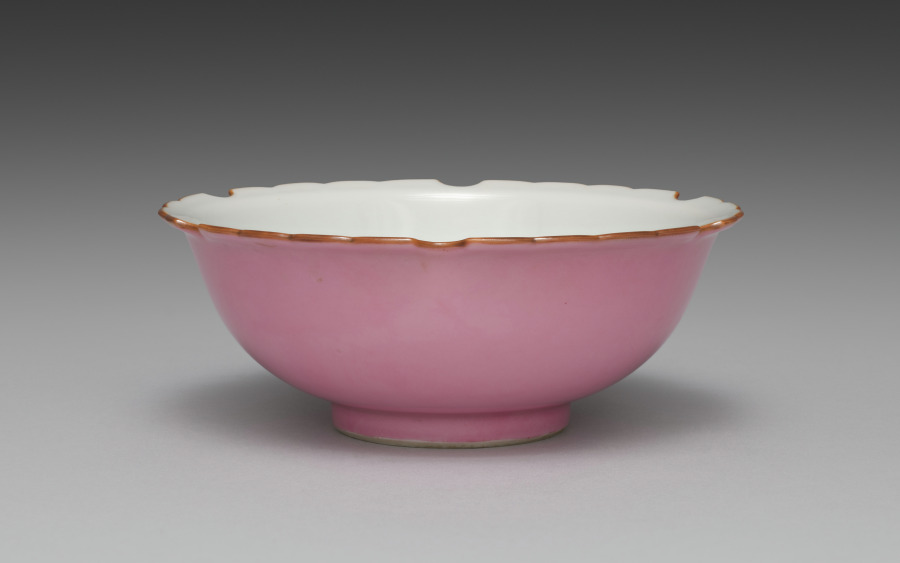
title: Dish from Snow-Flake Side Dishes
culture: Japan, Meiji period (1868–1912)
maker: Seifū Yohei III (Japanese, 1851–1914)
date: 1893–1914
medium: One from a set of six porcelain dishes; porcelain with lobed rims and pink glaze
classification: Ceramic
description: According to the box lid, this set of six side dishes, or mukōzuke, are “snow-flower style” (sekkashiki), having mouths shaped like snowflakes. Their mouths, which have six lobes and scalloped edges, are traced with brown iron oxide at the rim. The outside of each bowl is glazed with a very bright pink over the basin and foot, and the inside is left white. From directly above, one sees a snowflake-like shape, and from the side, they seem to float above a rosy ground.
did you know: The box for this set of dishes has an inscription on the side noting that they were for a person with the family name Nakamoto.